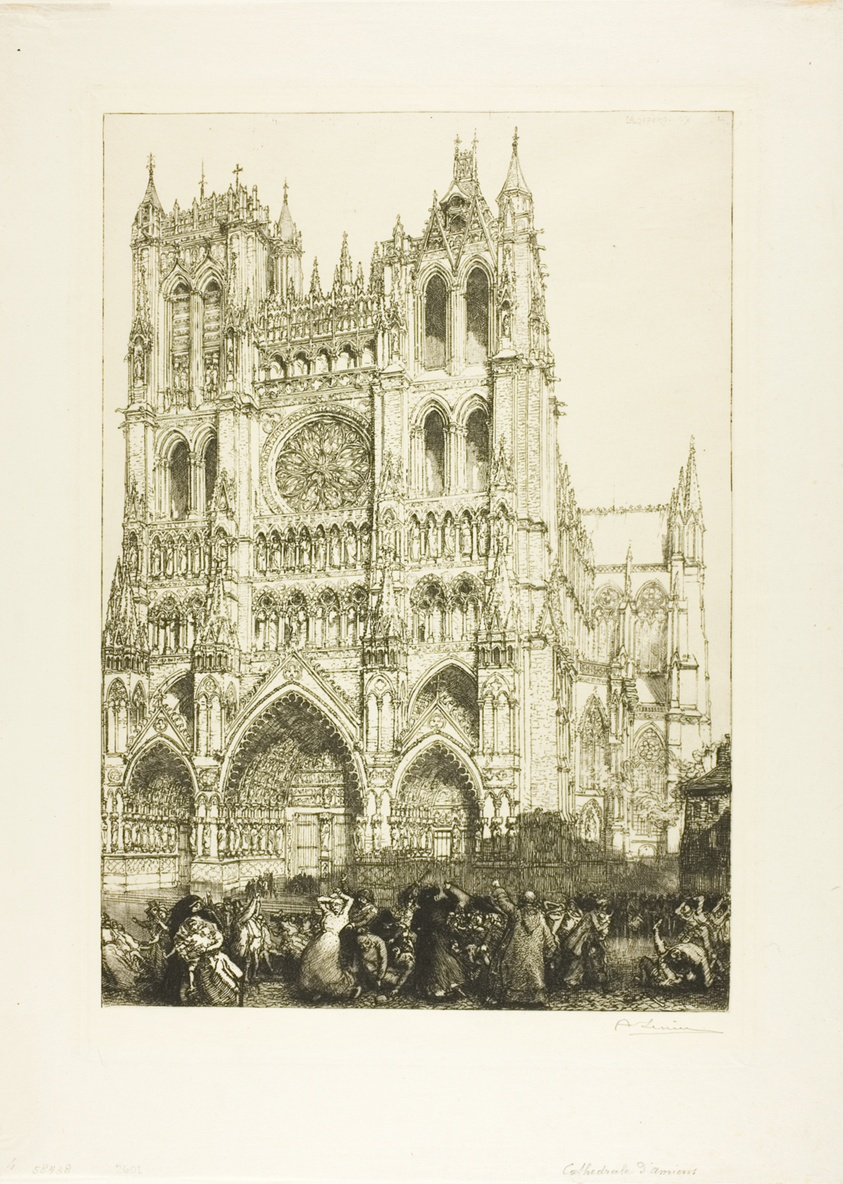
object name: Print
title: Amiens Cathedral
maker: Louis Auguste Lepère (French, 1849-1918)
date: 1907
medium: Etching on ivory Japanese paper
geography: France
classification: etching; engraving; print; prints and drawing